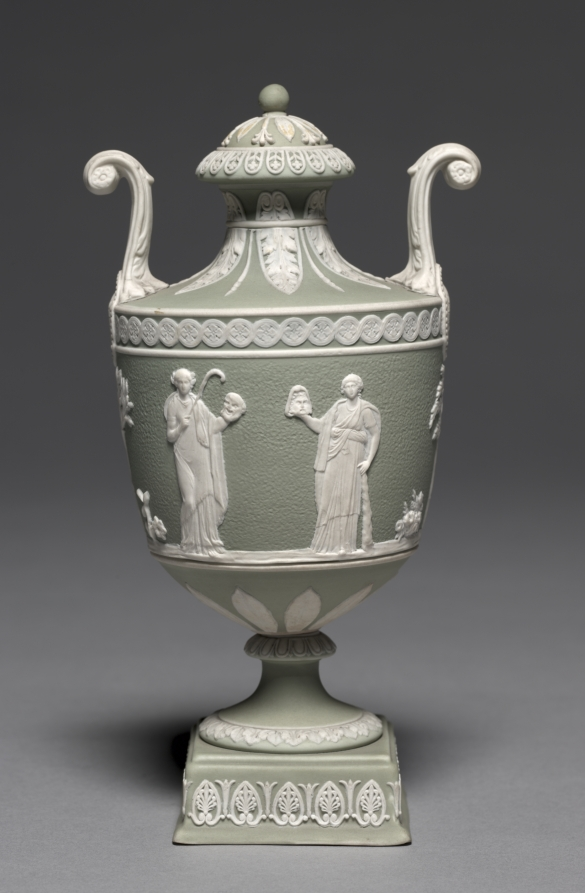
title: Urn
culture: England, Staffordshire, late 18th-early 19th Century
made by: Wedgwood Factory (British)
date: c. 1800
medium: jasper ware with relief decoration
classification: Ceramic